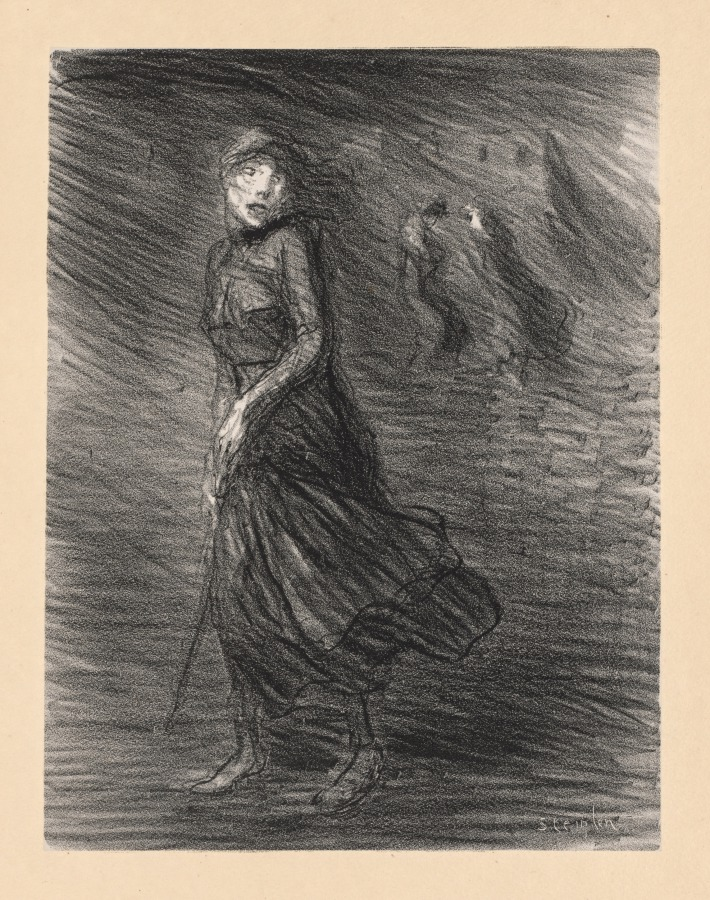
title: In the Street (Dans la Rue)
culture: Switzerland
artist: Théophile Alexandre Steinlen (Swiss, 1859–1923)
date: 1911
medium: Lithograph on chine collé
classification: Print